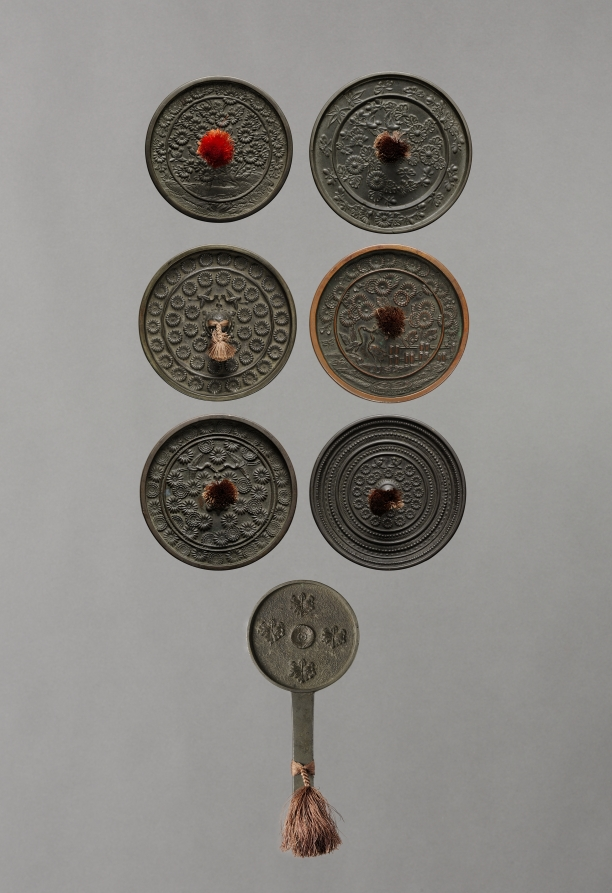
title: Mirror with Pair of Birds and Chrysanthemum Pattern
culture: Japan, Muromachi period (1392–1573)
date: 1392–1573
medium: bronze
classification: Metalwork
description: The Japanese used chrysanthemums as decorative elements on mirrors. In the Heian period, a chrysanthemum with cranes or long-tailed birds was a common motif. Later, in the Kamakura and Muromachi periods, chrysanthemum designs were divided into three patterns with different symbolic associations: Chrysanthemum with Cranes represented longevity; Water Flowing suggested longevity as well as the Noh drama Kikujido, or Chrysanthemum Boy; and East Fence alluded to the poem "Drinking Wine" by Tao Yuanming (AD 365-427). Here, the mirror featuring Buddhist iconography (kyojo) and a chrysanthemum design on the back shows that the flower was also appreciated in the context of Buddhism in the Kamakura period.